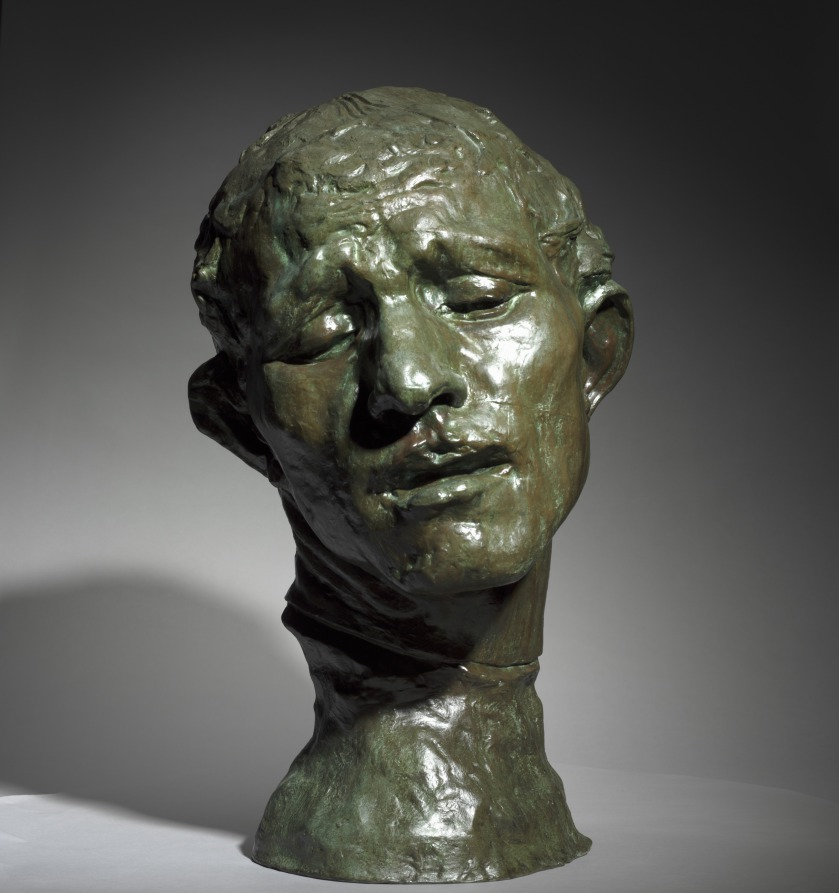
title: Heroic Head of Pierre de Wissant, One of the Burghers of Calais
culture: France, 19th century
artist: Auguste Rodin (French, 1840–1917)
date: 1886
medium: bronze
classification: Sculpture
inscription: inscribed at neck, left: A.Rodin; inscribed lower back: Alexis Rudier/Fondeur-Paris.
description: This sculpture depicts one of the figures in Rodin’s large public monument The Burghers of Calais (1884–89), featuring six French men who volunteered to be taken prisoner by the English in exchange for lifting the siege of Calais during the Hundred Years War (1337–1453). Pierre de Wissant’s anguished expression suggests extreme mental suffering as he contemplates his expected execution. Rodin exhibited a life-size version of the figure as an independent work before completing the monument. He later made multiple versions in various sizes and media.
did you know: This sculpture depicts the head of a figure from Rodin's large public monument The Burghers of Calais (1884-89). The CMA also owns a plaster version of the head.